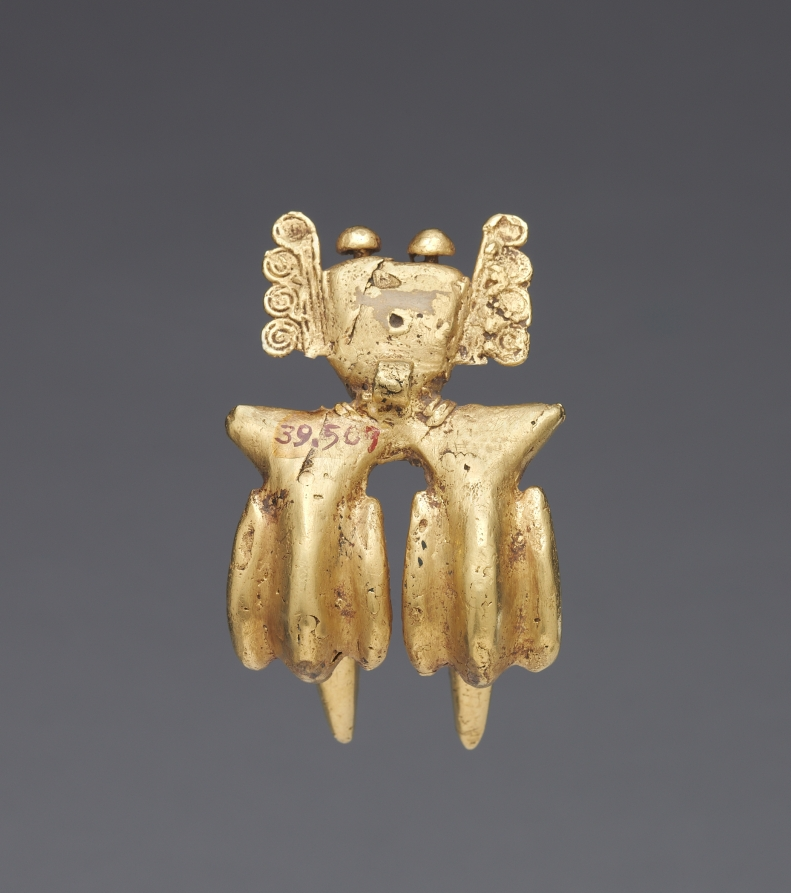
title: Pendant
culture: Panama, International Style, 5th-8th century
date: 400–700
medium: cast gold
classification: Metalwork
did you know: In the Panama-Costa Rica region, gold ornaments were associated with political and religious authority.